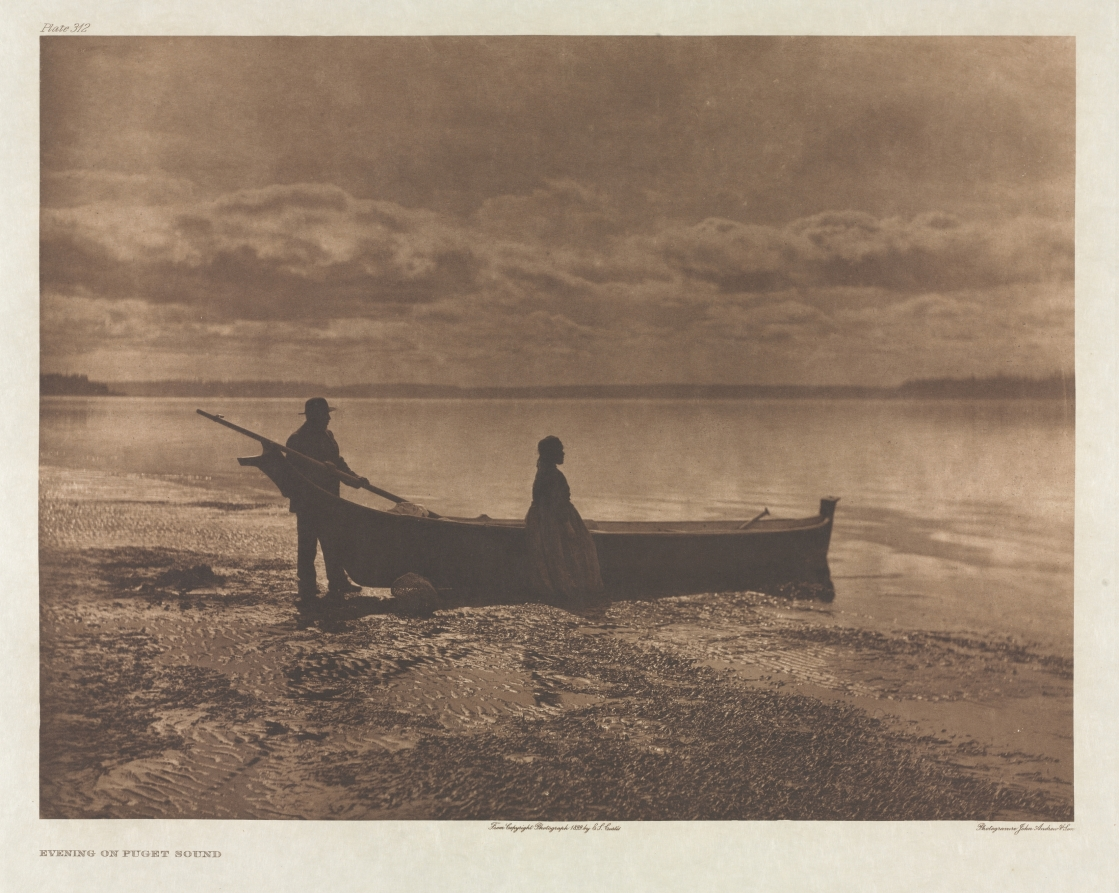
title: Portfolio IX, Plate 312: Evening on Puget Sound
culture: America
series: The North American Indian: being a series of Portfolios picturing and describing the Indians of the United States, the Dominion of Canada, and Alaska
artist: Edward S. Curtis (American, 1868–1952)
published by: The University Press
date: 1899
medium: photogravure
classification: Portfolio